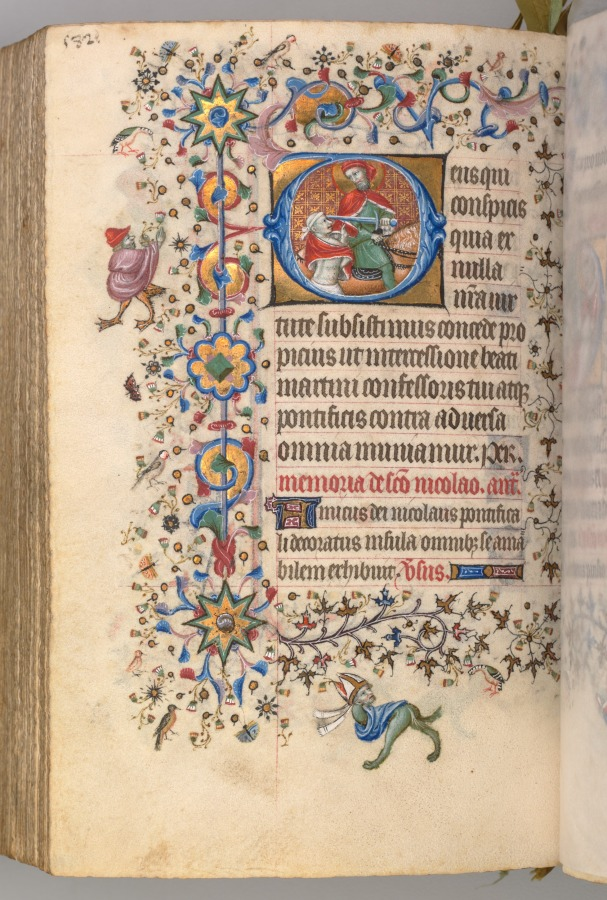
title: Hours of Charles the Noble, King of Navarre (1361-1425): fol. 285v, St. Martin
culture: France, Paris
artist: Master of the Brussels Initials and Associates (French)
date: c. 1405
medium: ink, tempera, and gold on vellum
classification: Bound Volume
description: This precious volume was obviously highly prized by its owner, the French-born King of Navarre, who had his coat of arms painted on no less than twenty folios. Rather than directly commissioning this manuscript from a specific workshop, it seems that Charles the Noble acquired his book of hours -- perhaps ready-made for the luxury market -- while on a trip to Paris in 1404-05. A collaborative effort, six painting styles are evidenced within the pages of this codex, those of two Italians, two Frenchmen, and two Netherlanders. The painter who was responsible for the planning and decoration of the book, and who produced seventeen of the large miniatures, was a Bolognese artist known as the Master of the Brussels Initials. His principal assistant, responsible for most of the borders, was a Florentine who signed his name "Zecho" da Firenze on folio 208 verso.